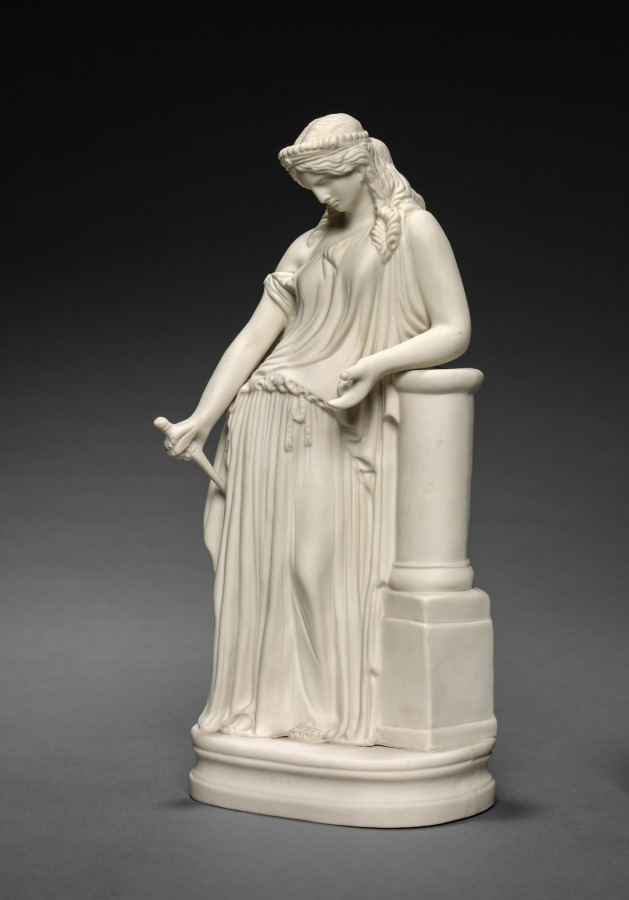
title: Figure of Medea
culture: England, 19th century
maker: W. T. Copeland & Sons (British)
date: c. 1870–1890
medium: Parian porcelain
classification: Ceramic